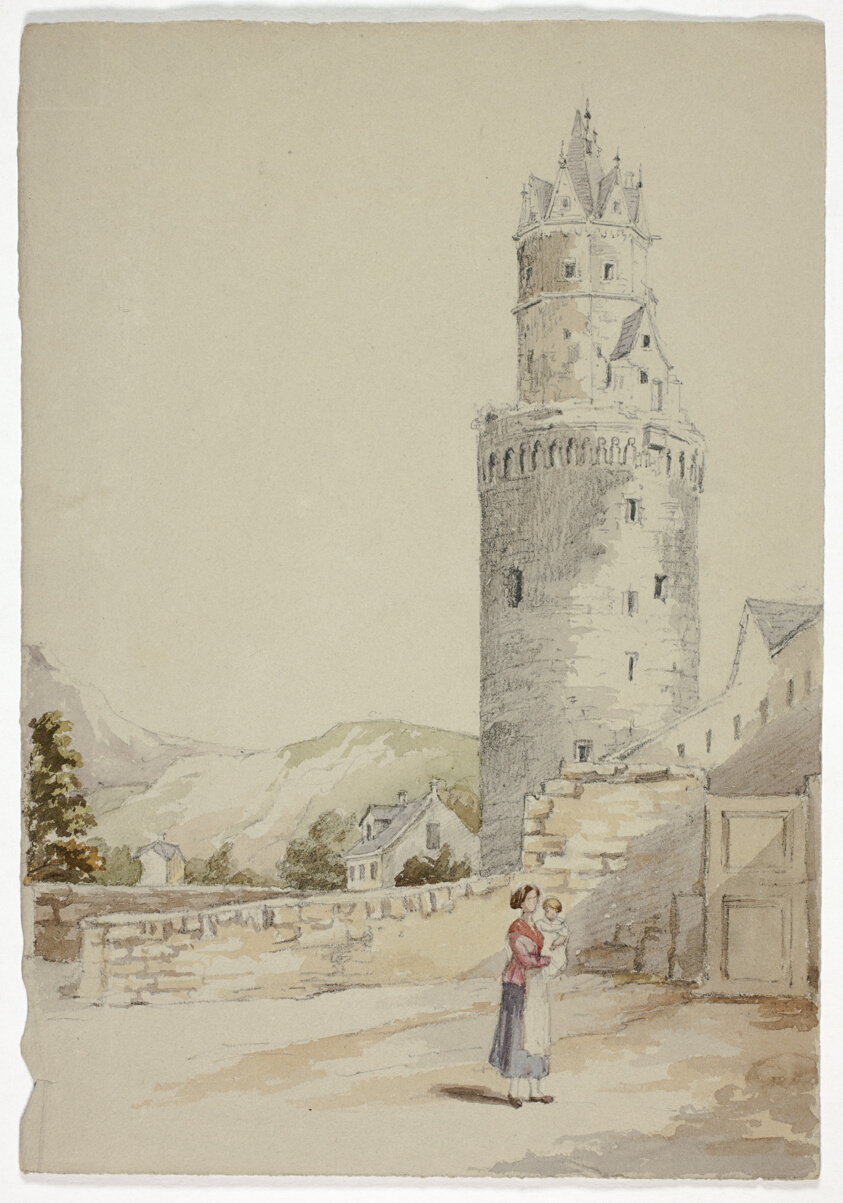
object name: Drawing and Watercolor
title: Woman and Child before Walled Town with Tower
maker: Elizabeth Murray (English, c. 1815-1882)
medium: Watercolor over graphite on gray wove paper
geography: England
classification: watercolor; drawings (visual works); prints and drawing